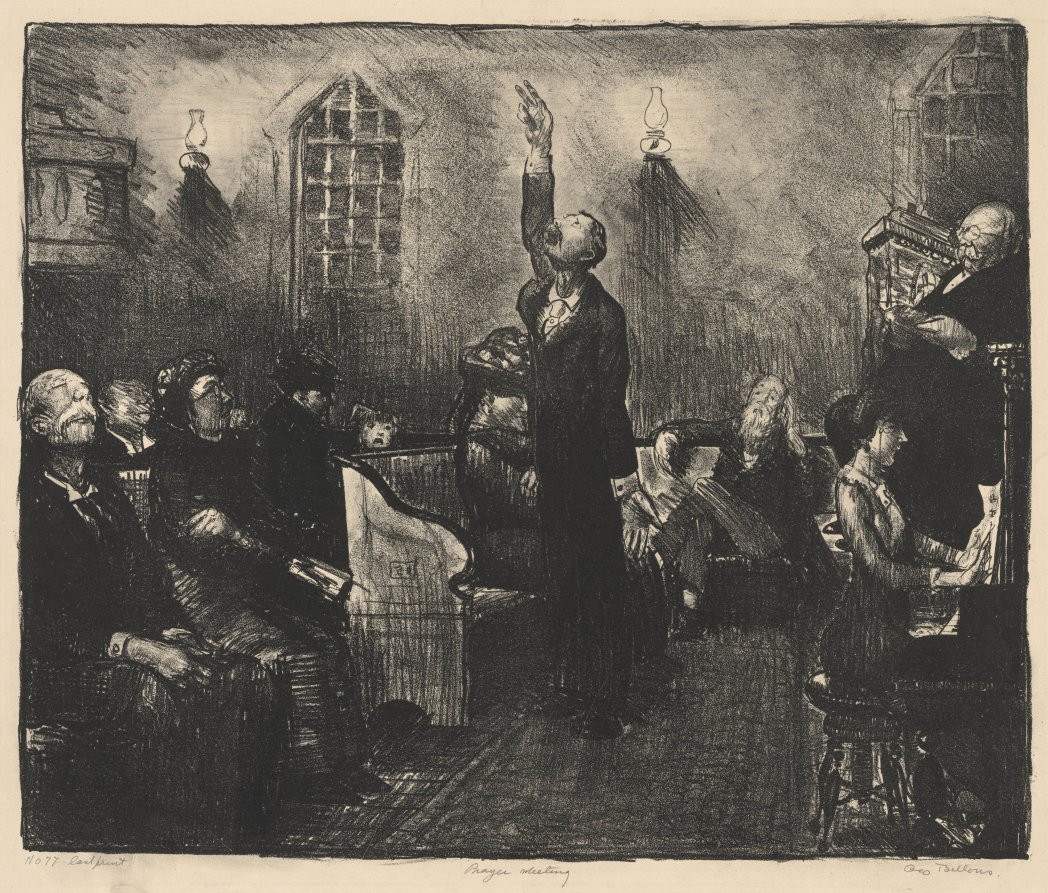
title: Prayer Meeting, First Stone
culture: America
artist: George Bellows (American, 1882–1925)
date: 1916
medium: lithograph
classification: Print